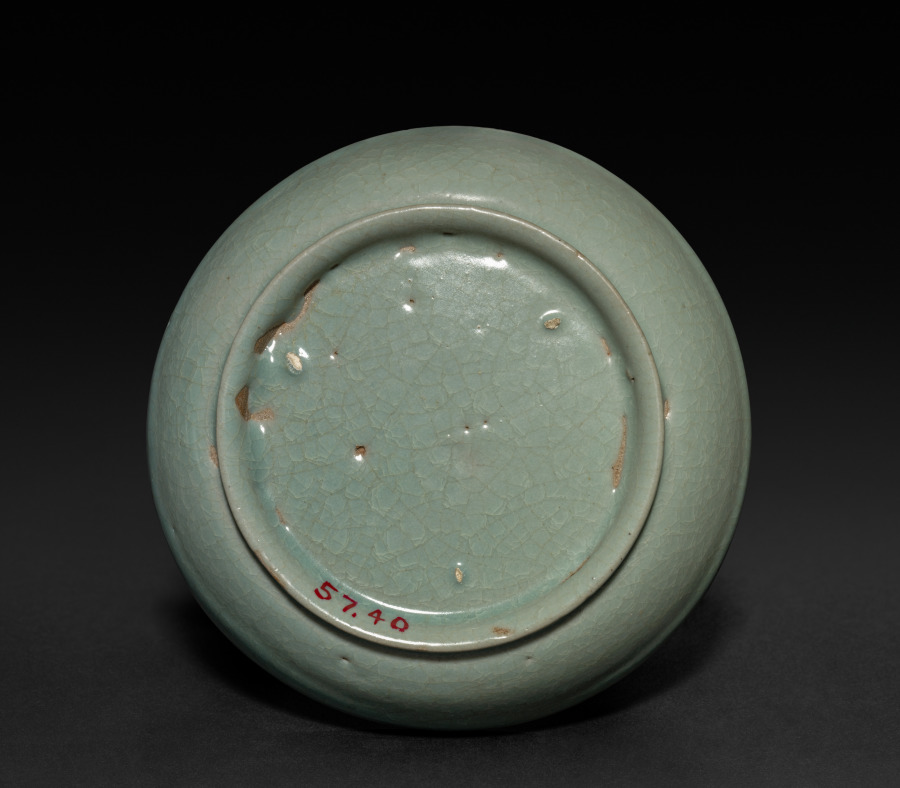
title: Brush Washer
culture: China, Henan Province, Baofeng, Qingliangsi, Northern Song dynasty (960-1127)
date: late 1000s–1127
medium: porcelaneous stoneware, Ru ware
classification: Ceramic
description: Ru ware is the rarest and most celebrated of all Chinese imperial wares. It was made for the late Northern Song court for a very short time and was therefore extremely rare and precious. Simplicity and refined elegance are Ru ware's hallmarks. Its graceful shape, soft luster, and subtle color variation of the glaze interact in perfect unity. Other physical characteristics include an ash-grey body, soft greyblue glaze with a fine crackle, as well as small sesame-seed spur marks on the base.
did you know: The little black spot in the glaze inside the dish is one of the slight imperfections characteristic of genuine Ru ware.